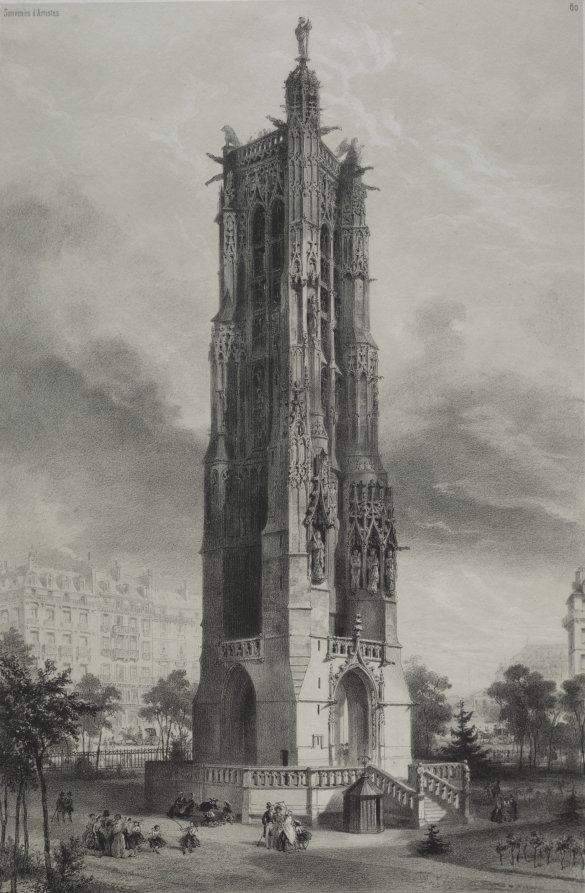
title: La Tour St. Jacques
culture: France, 19th century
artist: Victor Coindre (French)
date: c. 1838–82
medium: lithograph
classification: Print